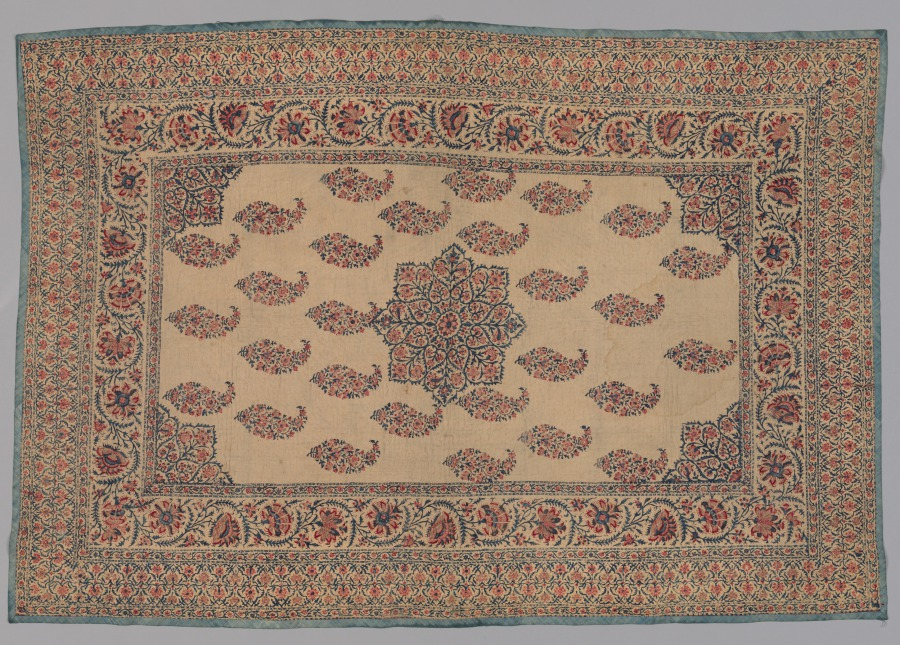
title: Prayer Mat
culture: India, early 19th century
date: early 1800s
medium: block printed and painted quilted cotton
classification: Textile